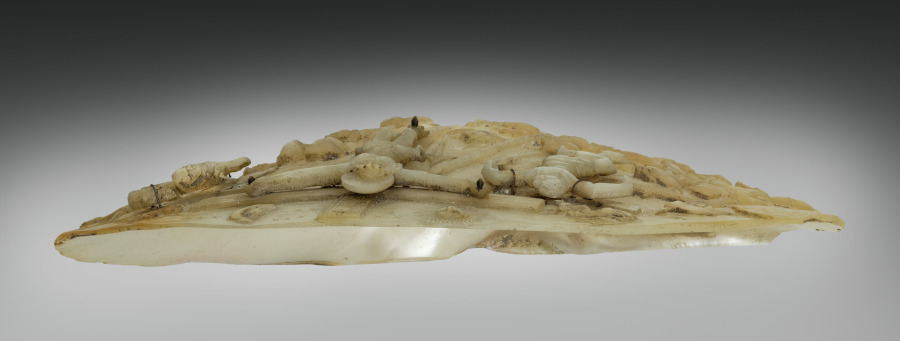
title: Calvary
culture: Germany, Middle Rhine?, 15th century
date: c. 1450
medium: mother-of-pearl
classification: Sculpture